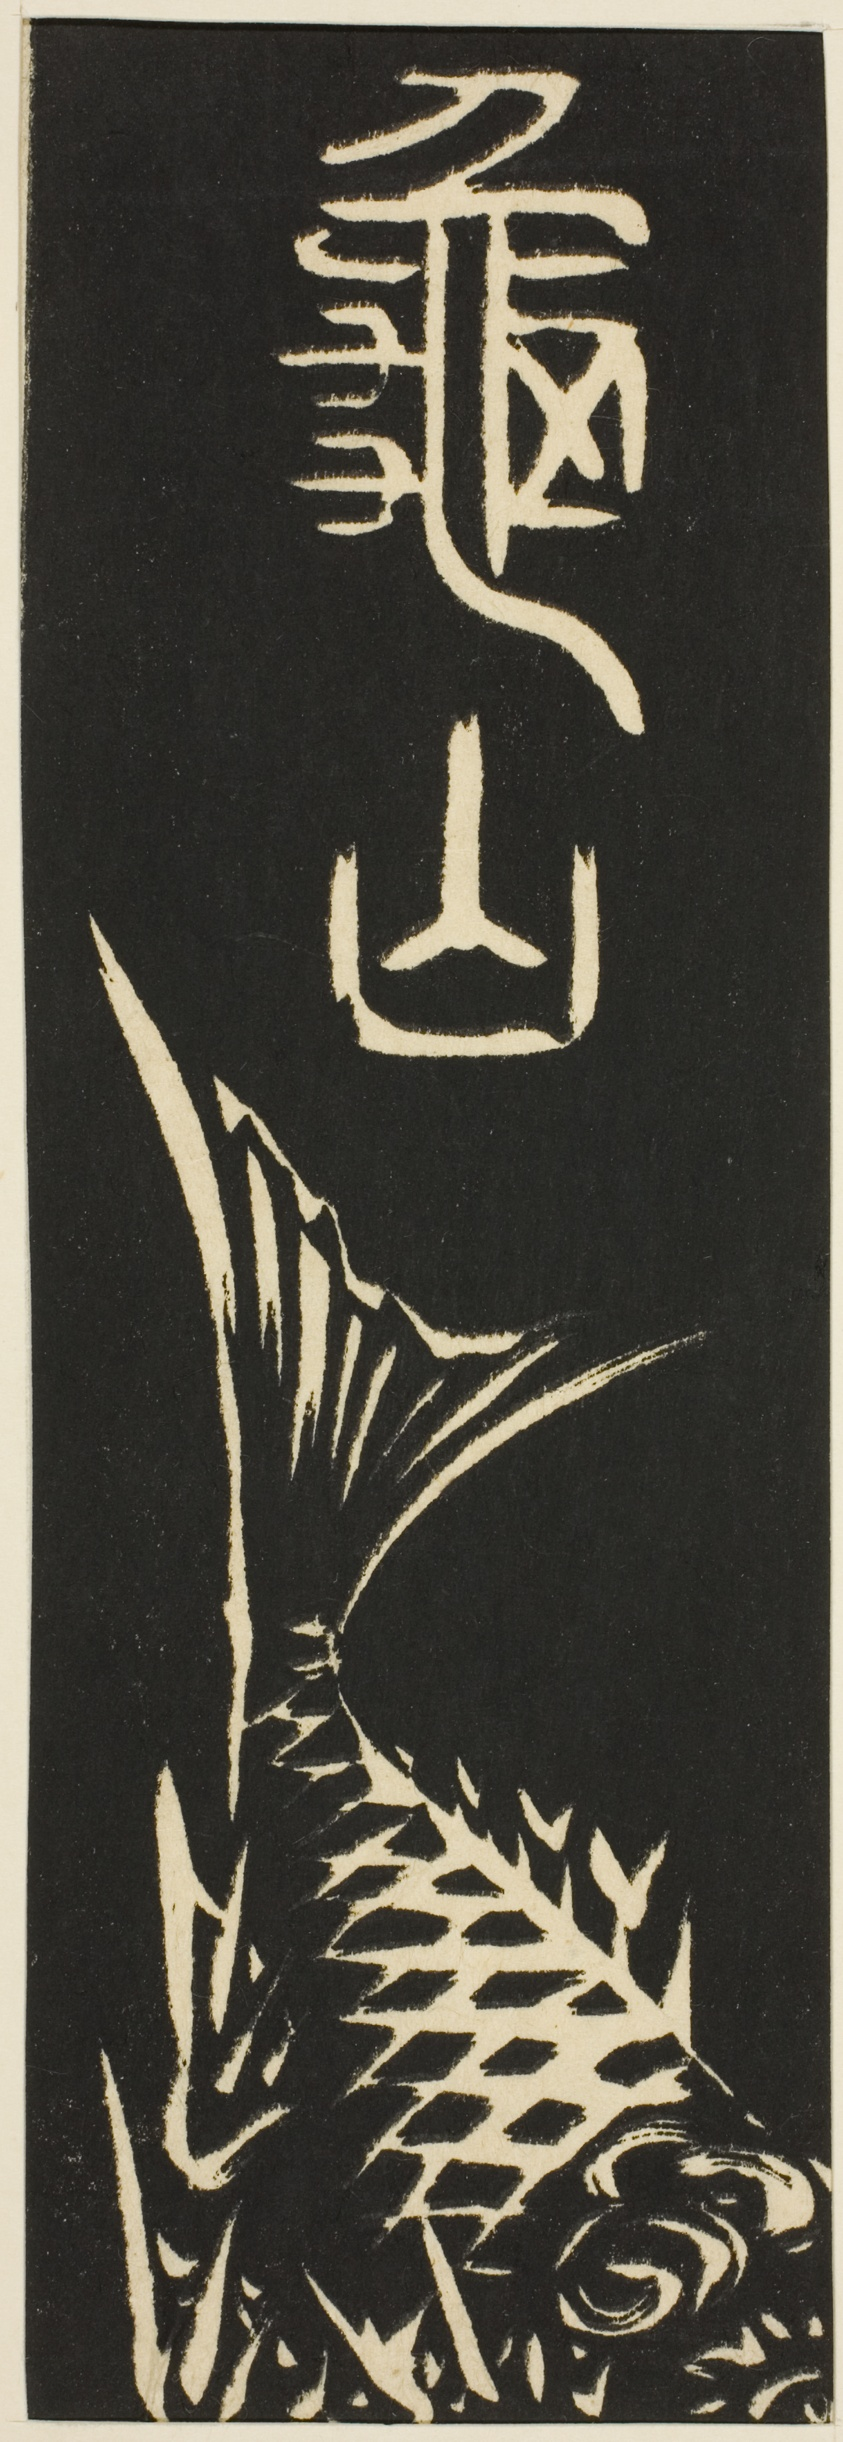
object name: Print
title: Kameyama, section of sheet no. 12 from the series "Cutouts of the Fifty-three Stations (Gojusan tsugi harimaze)"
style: Japanese (culture or style)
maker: Utagawa Hiroshige 歌川 広重; Japanese, 1797-1858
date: 1852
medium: Color woodblock print; section of harimaze sheet (uncut sheet: 1939.1297)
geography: Japan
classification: woodblock print; print; asian art